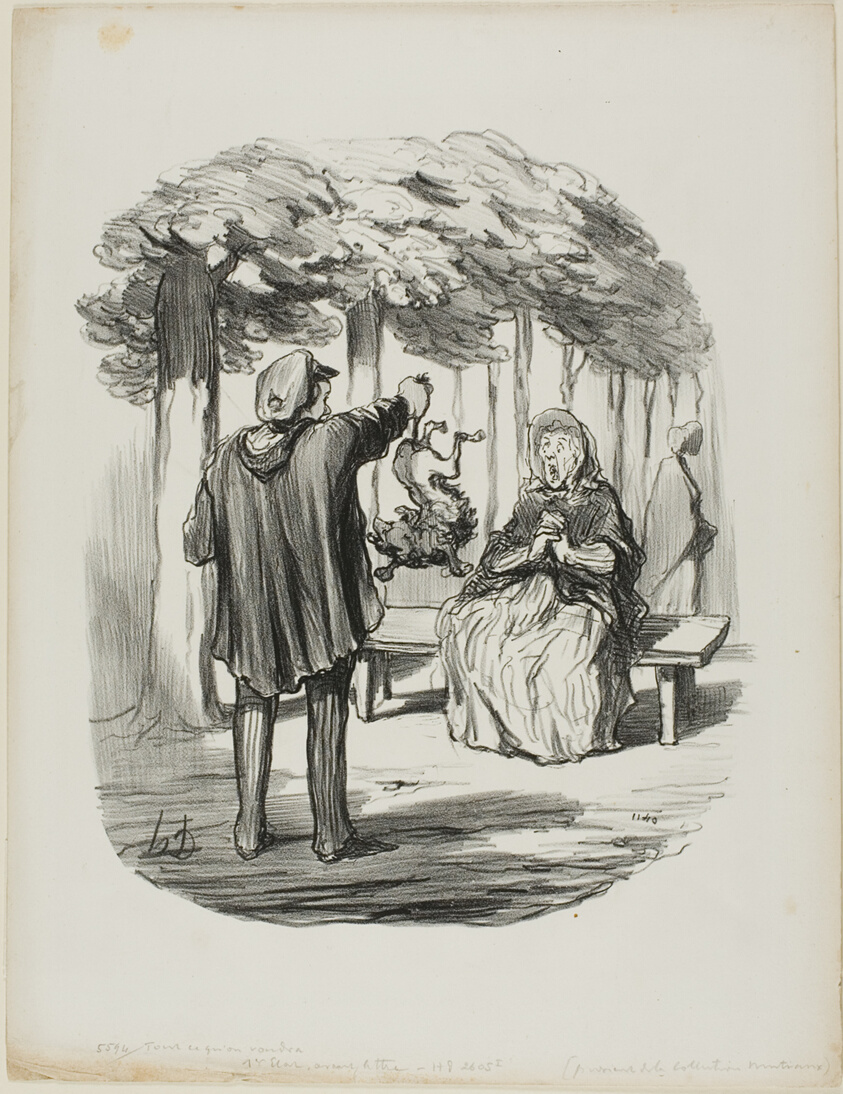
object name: Print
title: "Is this your dog here?," plate 20 from Tout Ce Qu'on Voudra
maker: Honoré Victorin Daumier; French, 1808-1879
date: November 4, 1847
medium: Lithograph in black on white wove paper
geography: France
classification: lithograph; print; prints and drawing